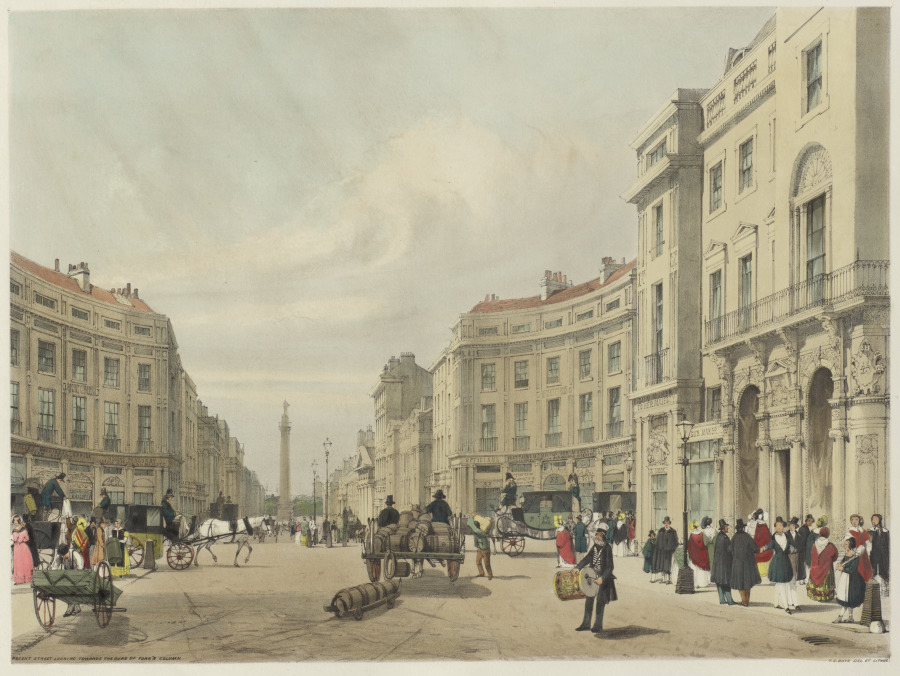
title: London As It Is: Regent Street, looking towards the Duke of York's Column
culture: England, 19th century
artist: Thomas Shotter Boys (British, 1803–1874)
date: 1842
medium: lithograph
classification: Bound Volume